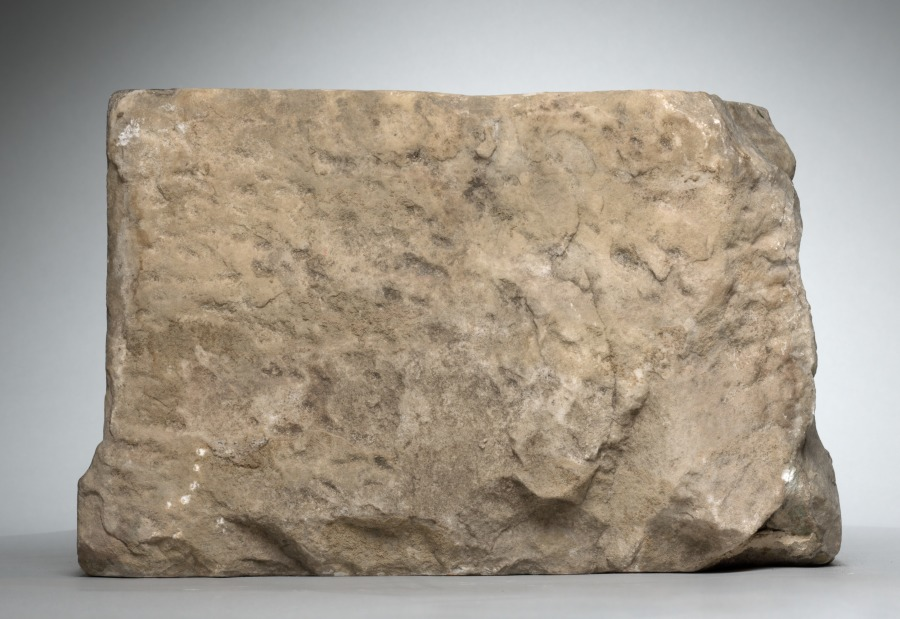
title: Double Column Base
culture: France, late 15th century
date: late 1400s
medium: marble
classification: Sculpture